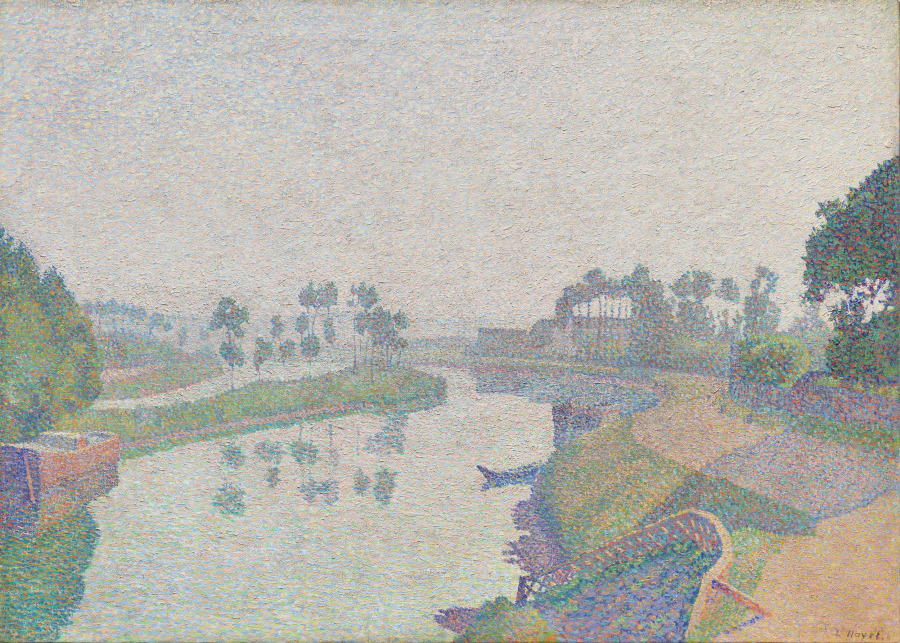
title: Banks of the Oise at Dawn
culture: France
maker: Louis Hayet (French, 1864–1940)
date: 1888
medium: Oil on canvas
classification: Painting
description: Louis Hayet was an important, early practitioner of Neo-Impressionism, or Pointillism, the practice of applying small strokes or dots of paint so that from a distance the hues visually blend together and create an intense sensation of color and light. Notice the way in which Hayet painted the pale dawn sky—and its reflection in the River Oise—with strokes of pink, orange, blue, yellow, and green paint. When seen at a distance, the effect is of early morning, before the sun has fully risen.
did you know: Hayet received considerable critical praise for his original idea of developing a Neo-Impressionist color chart that incorporates gray tones.